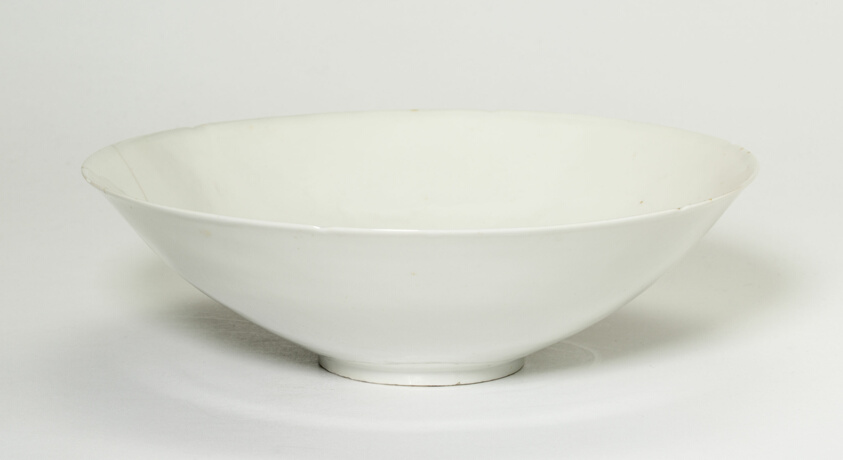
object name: Vessel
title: Bowl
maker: China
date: Ming dynasty (1368–1644), Yongle period (1403–1435)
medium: Porcelain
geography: China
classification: porcelain; ceramics; asian art; vessel